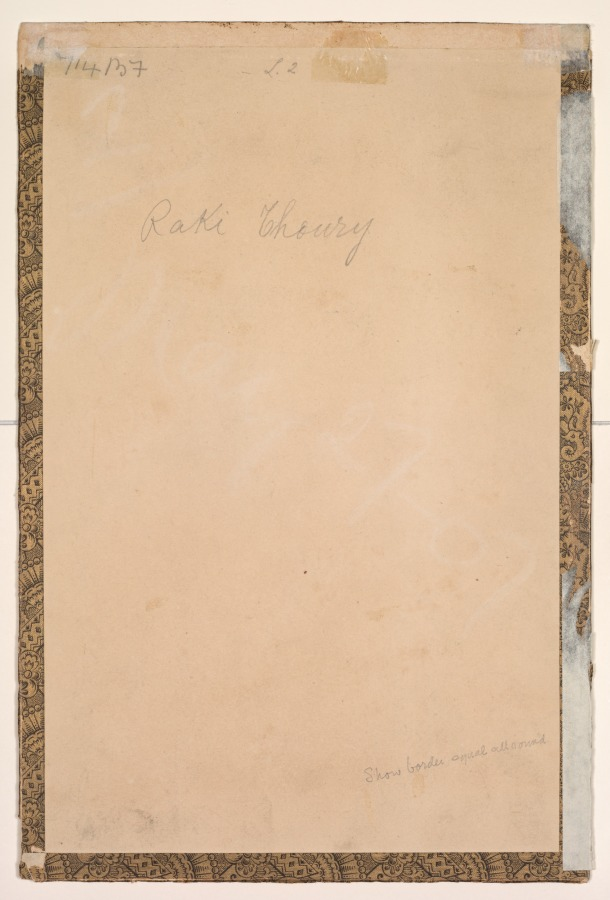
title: Todi Ragini, from a Ragamala Series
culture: Eastern India, Bengal, Murshidabad, 18th century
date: c. 1755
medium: Gum tempera and gold on paper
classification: Painting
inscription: identified at top in gold: ragini todi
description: Ragamala paintings were recognized as being associated with a season and time of day. Evoking a late morning in spring, here a young woman beguiles deer from the woodlands with her music to prevent them from destroying the crops in the field. The saturated hues and romantic idealization of the scene continue idioms begun in the Mughal court that were disseminated to regional centers of patronage such as Murshidabad. The inscription at the top of this page identifies the name, ragini todi, in Arabic script, which suggests that this ragamala series was made for a Muslim patron.